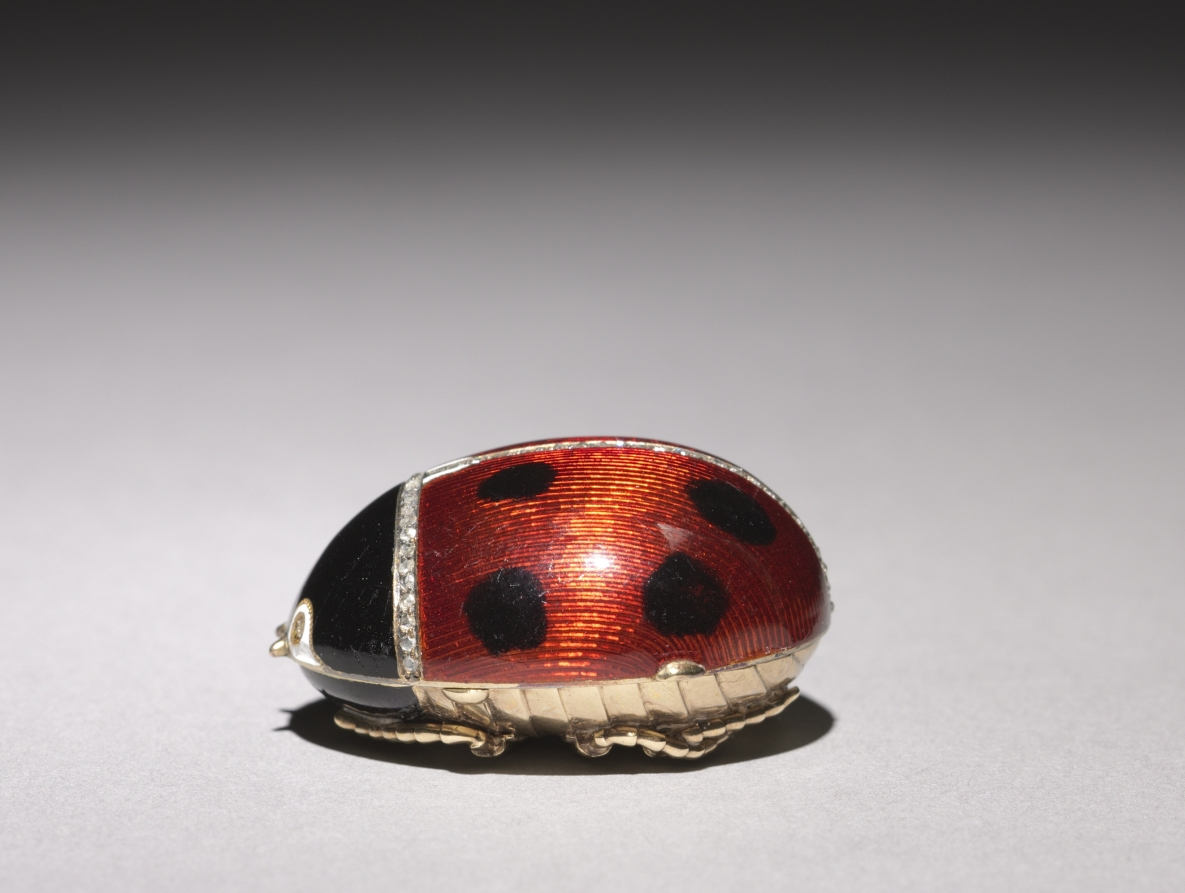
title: Ladybird Beetle Pillbox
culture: Russia, St. Petersburg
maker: House of Fabergé (Russian, 1842–1918)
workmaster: Mikhail Evlampievich Perkhin (Russian, 1860–1903)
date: 1896–1903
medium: gold, enamel, diamonds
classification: Miscellaneous